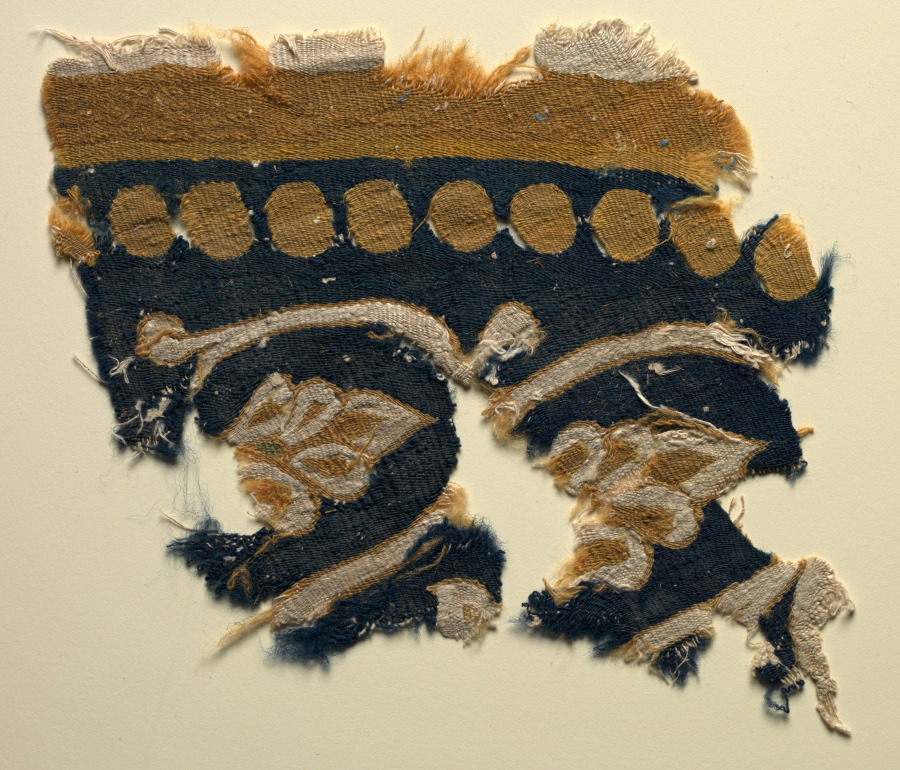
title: Fragment from a Hanging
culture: Egypt, Tulunid period, 9th century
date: 800s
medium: tapestry; linen and wool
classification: Textile